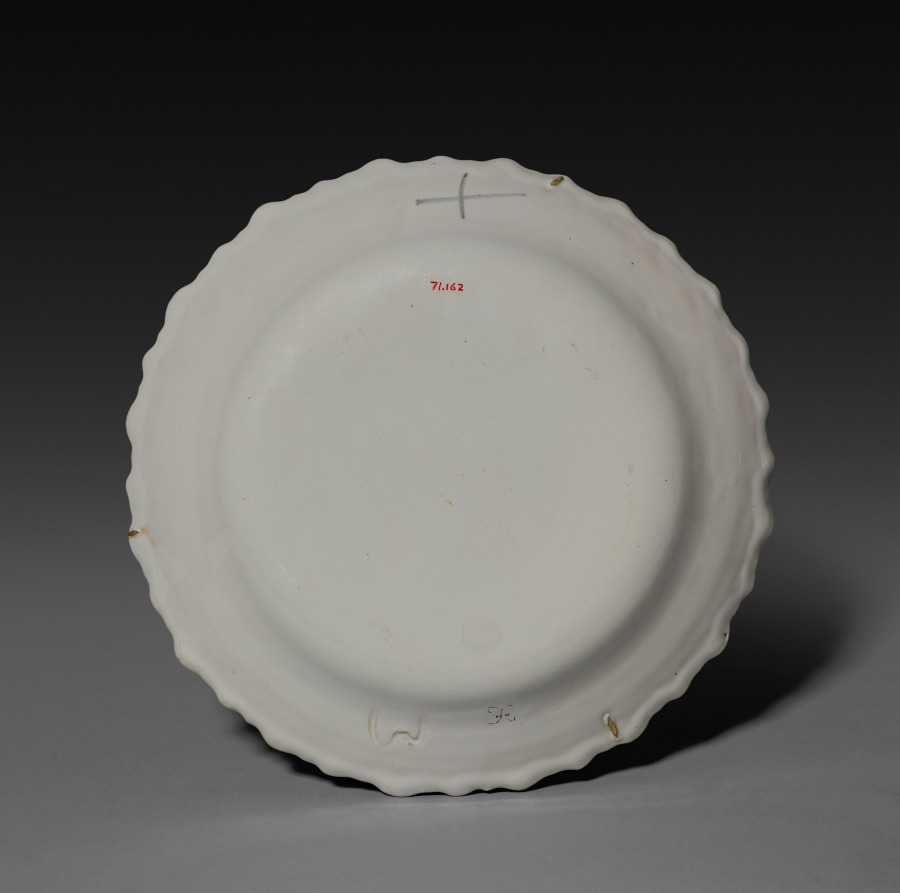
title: Plate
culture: France, Moustier, 18th century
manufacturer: Ferrat Factory (French)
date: c. 1770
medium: faience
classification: Ceramic